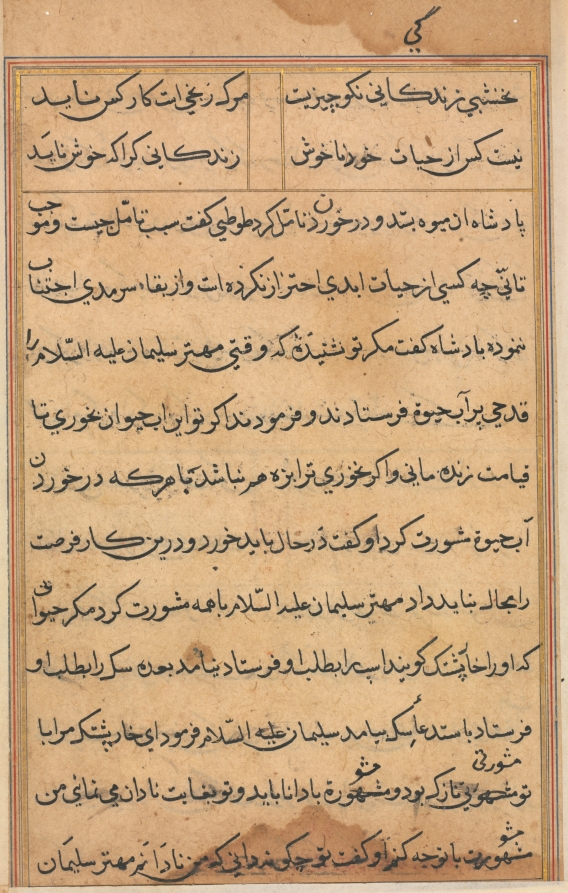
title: Page from Tales of a Parrot (Tuti-nama): text page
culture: Mughal India, court of Akbar (reigned 1556–1605)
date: c. 1560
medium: gum tempera, ink, and gold on paper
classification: Painting